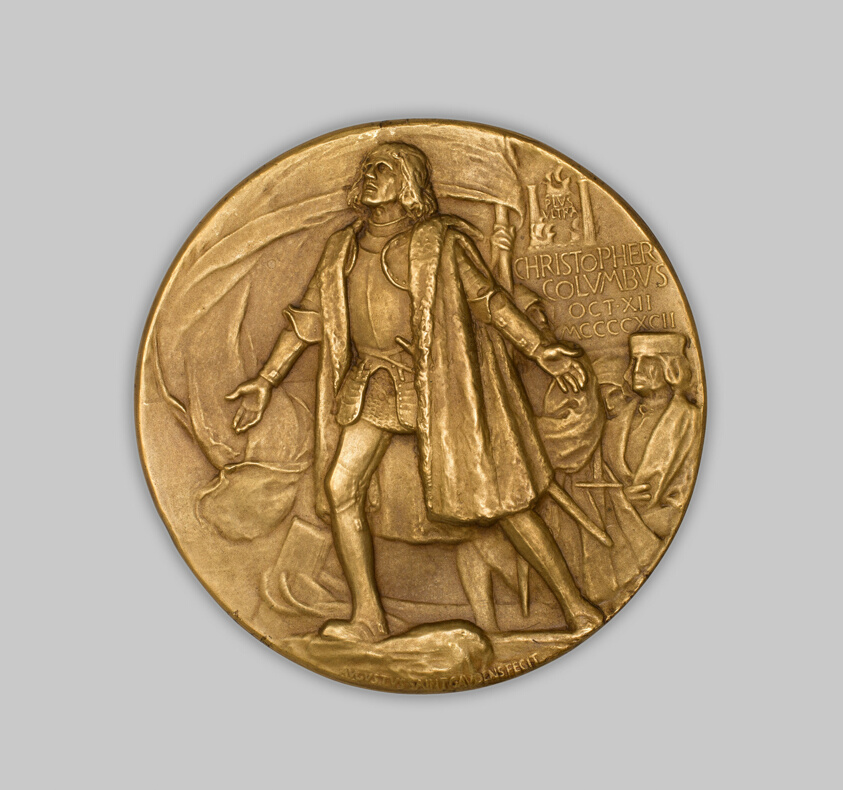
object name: Metalwork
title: World's Columbian Exposition Commemorative Presentation Medal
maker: Augustus Saint-Gaudens (American, born Ireland, 1848–1907)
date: 1892–94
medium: Bronze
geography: United States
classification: medal; american arts; decorative arts